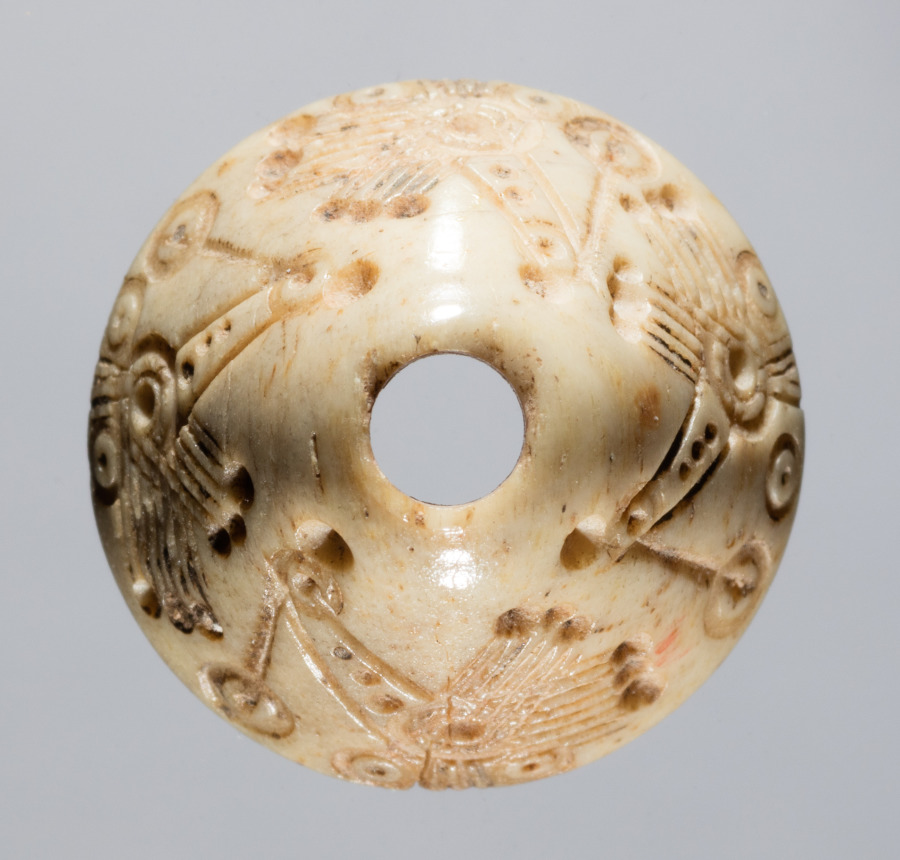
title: Spindle Whorl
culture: Iran, early Islamic period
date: 700s - 900s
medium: bone, incised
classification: Spindle Whorl